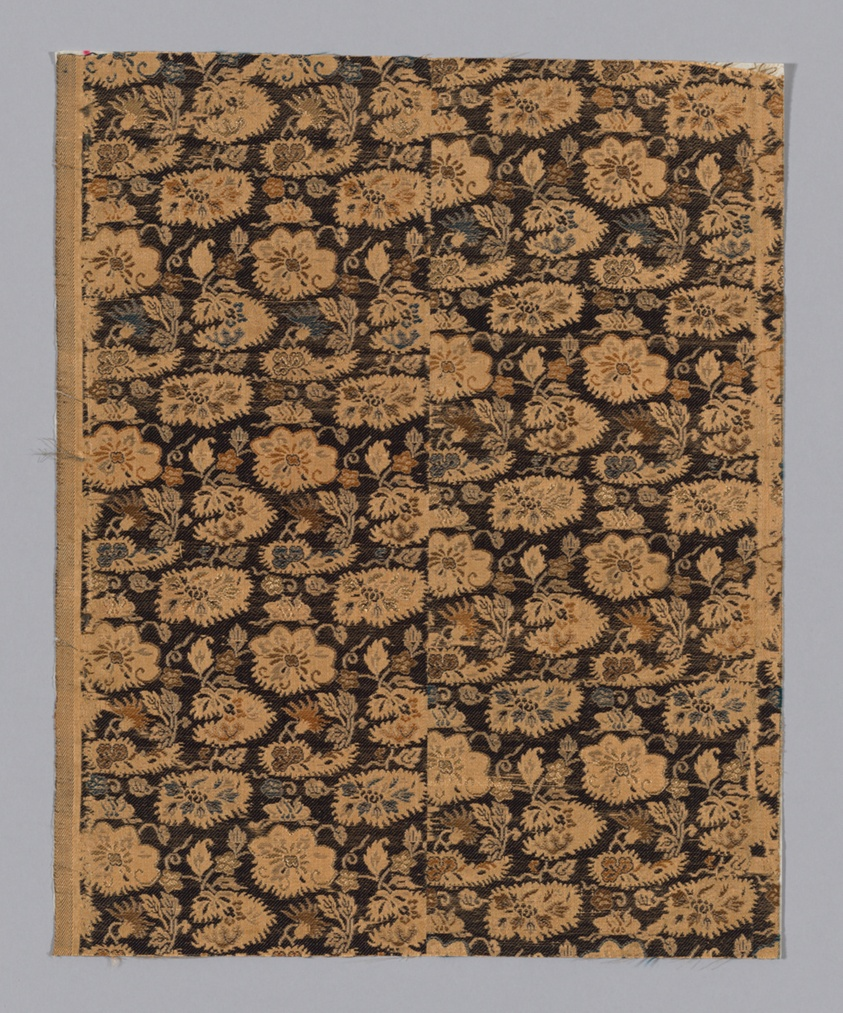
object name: Textile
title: Fragment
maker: Japan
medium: silk and gilt paper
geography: Japan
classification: textile; weaving